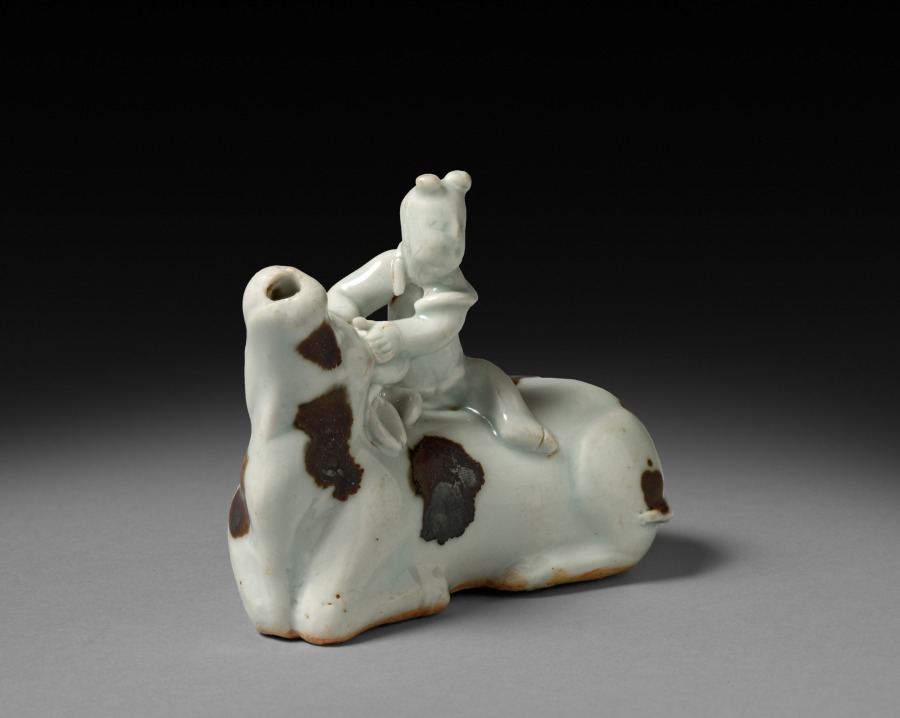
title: Buffalo with Rider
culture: China, Jiangxi Province, Jingdezhen kilns, Yuan dynasty (1271–1368)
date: early 1300s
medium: glazed porcelain with iron spots, qingbai ("blue-white") ware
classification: Ceramic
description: Boys tending buffalos were associated with a carefree life in the countryside free from the duties of officialdom. Water droppers contained water that was used to dissolve ink sticks into liquid ink for brush painting and writing.